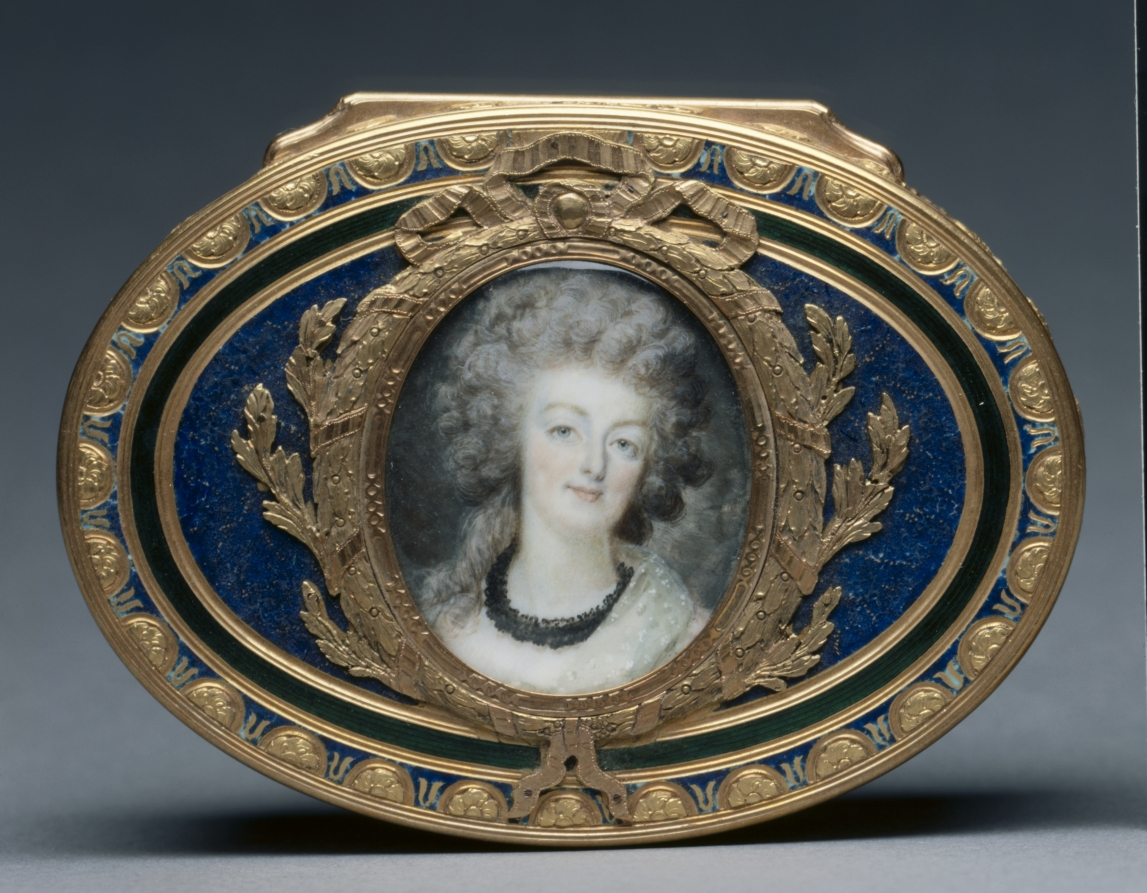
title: Snuff Box (Tabatière) with Portrait of Marie Antoinette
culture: France, 18th century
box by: Pierre-François-Mathis de Beaulieu (French)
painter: François Dumont (French, 1751–1831)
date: 1768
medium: watercolor on ivory in a gold and enamel box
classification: Enamel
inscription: [Maker's mark of Pierre-François-Mathis de Beaulieu, master goldsmith in 1768, inside cover]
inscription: [Charge mark of Jean-Jacques Prévot, 1762-1768, inside cover]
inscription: [Warden's mark of Paris, 1768-1769, inside cover]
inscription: [Discharge mark of Julien Alaterre, Paris, 1768-1774, on neck at right]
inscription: [Inside box, the letter]: "F"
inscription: [On bezel at left, engraved number]: "627"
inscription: [On front of bezel, engraved signature]: "Ve Georges Beaulieu à Paris"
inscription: [On right of miniature portrait, the letter]: "D"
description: This box was created through the collaboration of two skilled and well-known artisans of the period, master goldsmith Pierre-François-Mathis de Beaulieu and celebrated miniature painter François Dumont. The portrait of Marie Antoinette on the box's lid is painted in Dumont’s own style while those on the sides and bottom of the box take inspiration from the work of painter François Boucher, known for his pastoral scenes in the Rococo style.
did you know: Marie Antoinette, queen consort of French King Louis XVI and great patron of the decorative arts, was executed in 1793 at the end of the French Revolution.